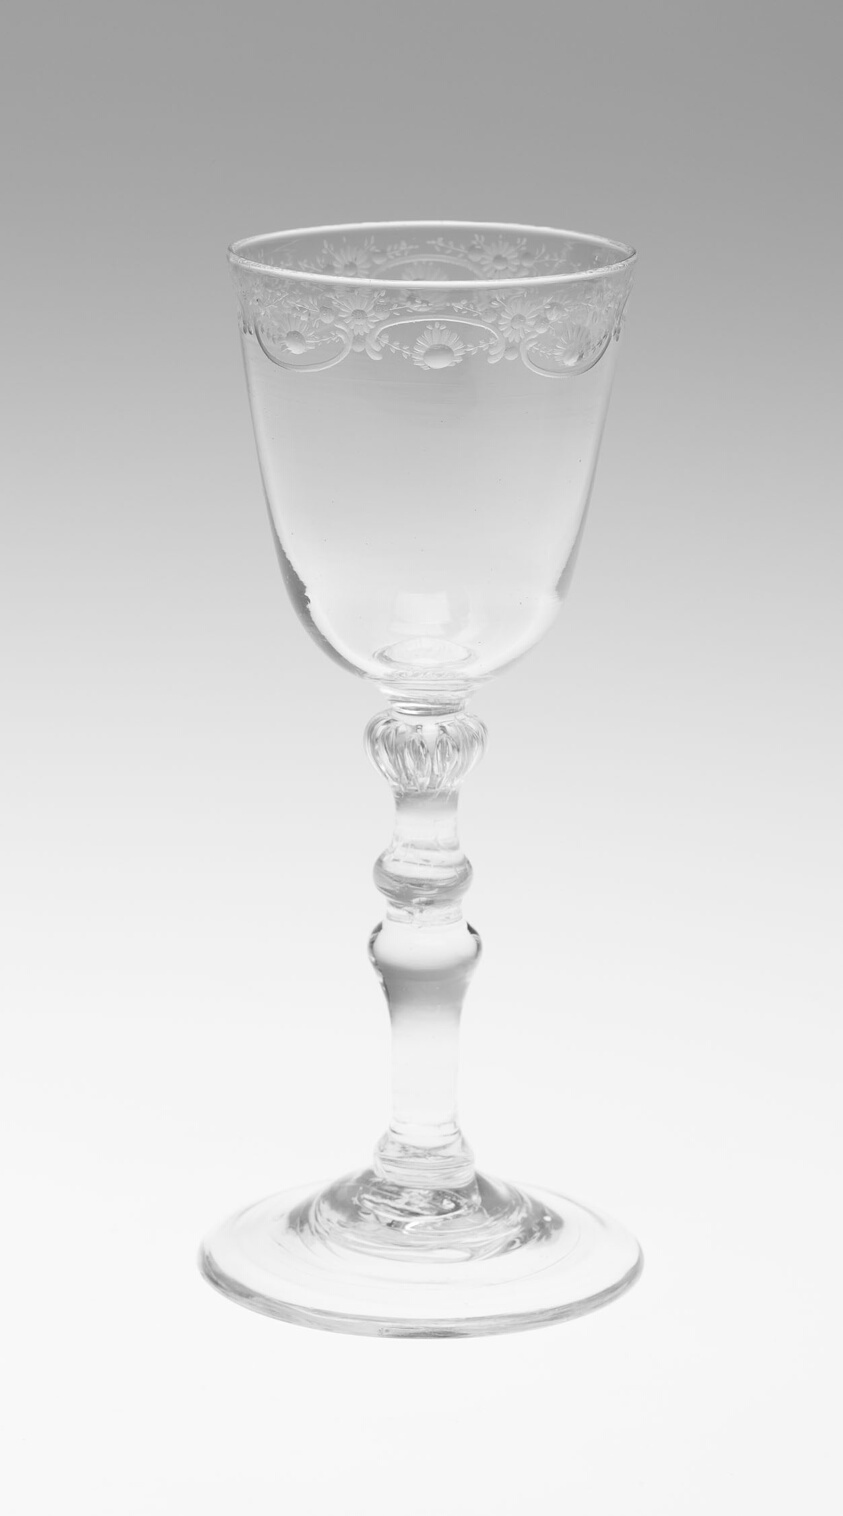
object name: Glass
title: Wine Glass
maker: England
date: c. 1745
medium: Glass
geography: England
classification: drinking vessel; glass